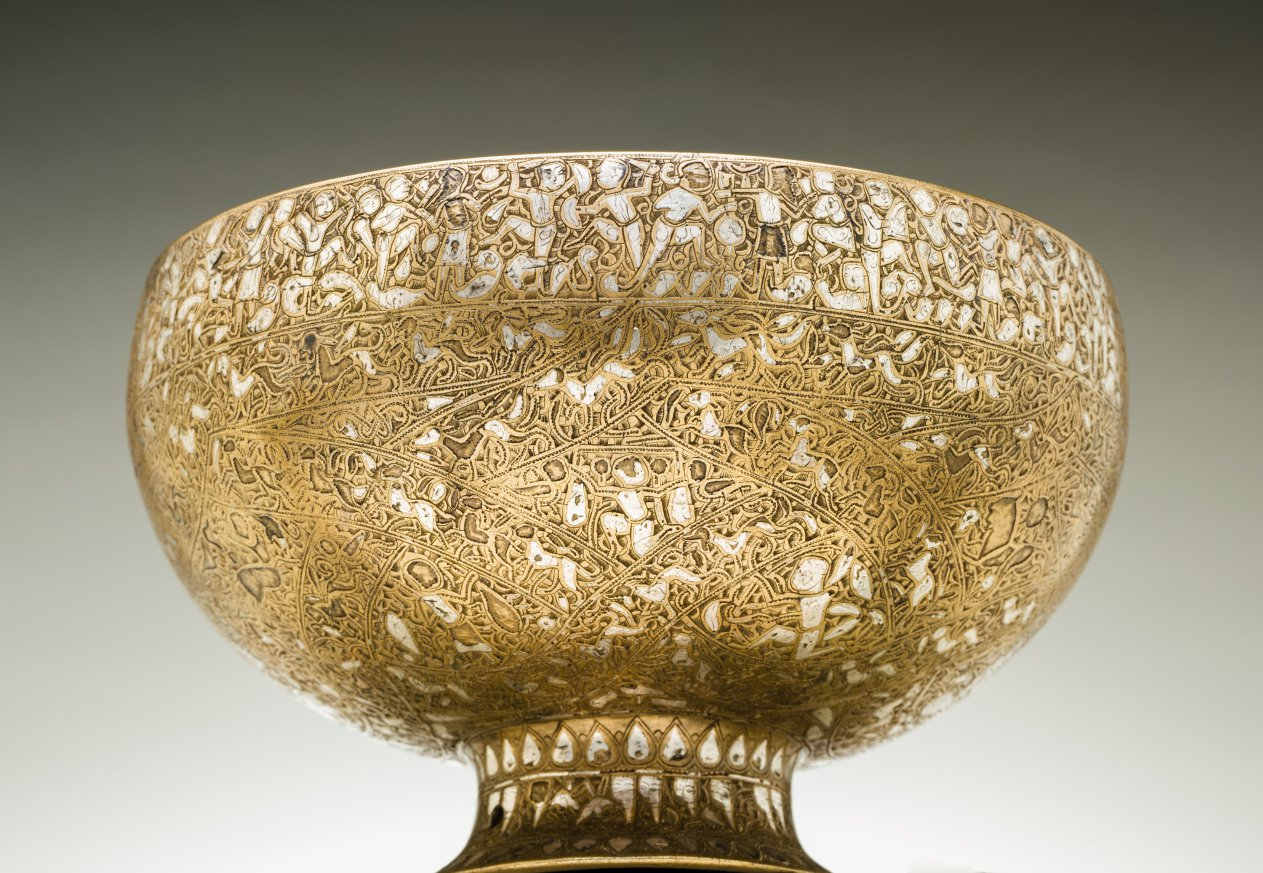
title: The Wade Cup with Animated Script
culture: Iran, Seljuq period of Iran (1037–1194)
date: 1200–1221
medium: brass inlaid with silver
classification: Metalwork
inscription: Glory, and success, and government, and bliss, and soundness, and peace of mind, and mercy, and well-being, and good health, and duration, and increase, and satisfaction, and care, and continuance to its owner.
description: The highlight of the cup’s decoration is the inscription around the rim, which you see on the walls around you, with letters composed of human figures, animals, and birds. This is known as animated script and it developed in northeast Iran or Afghanistan during the mid-1100s and migrated westward. The inscription on the rim of the Wade Cup is the pinnacle of this form of script with its full-figure animation. The body of the cup is covered with interlacing bands of compartments containing tiny figures of humans and animals. These represent the 12 signs of the zodiac from astrology, the practice of interpreting the influence of planets and stars on earthly affairs. Astrology began in Mesopotamia, was adopted by the Greeks, and then absorbed into medieval Islamic culture through translations of Greek texts.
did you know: This is known as the Wade Cup, after J. H. Wade who bequeathed the funds for its acquisition